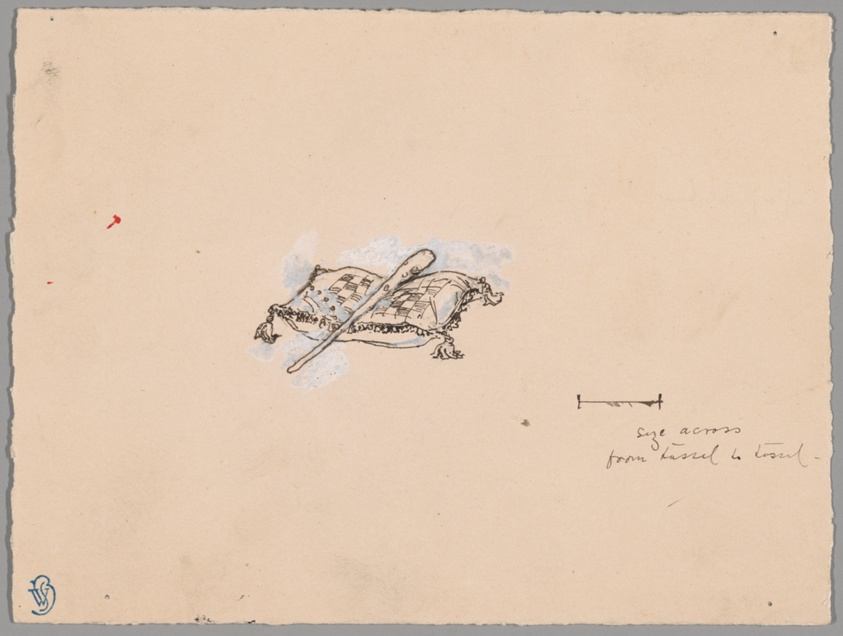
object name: Drawing and Watercolor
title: A Club on a Cushion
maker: James McNeill Whistler (American, 1834-1903)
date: 1898/99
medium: Pen and black ink over graphite, with corrections by the artist in white opaque paint, on cream wove card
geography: United States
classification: pen and ink drawings; drawings (visual works); prints and drawing; paper